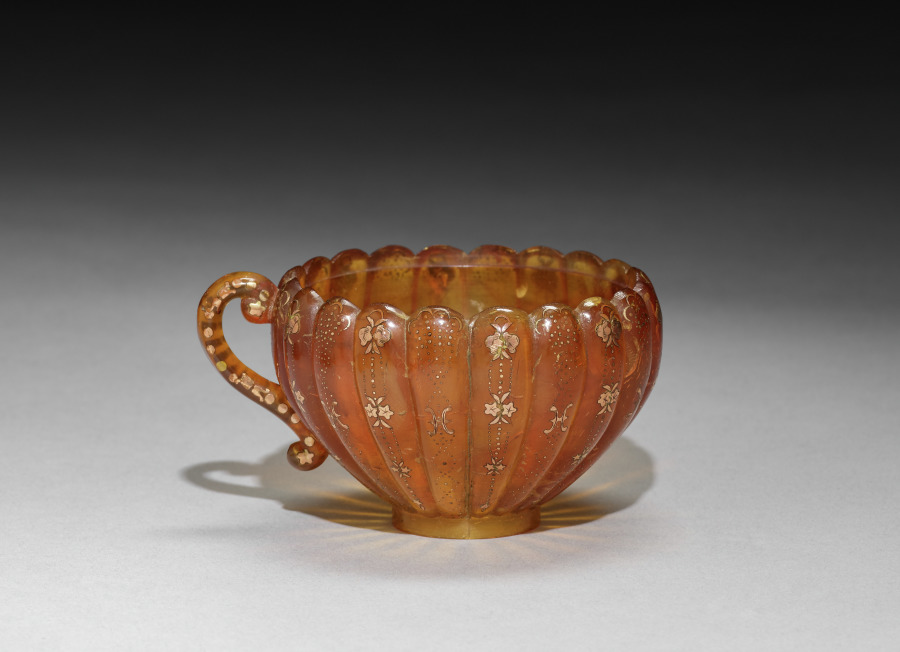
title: Cup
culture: France, 18th century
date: c. 1730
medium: amber decorated with inlaid gold and mother-of-pearl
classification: Miscellaneous